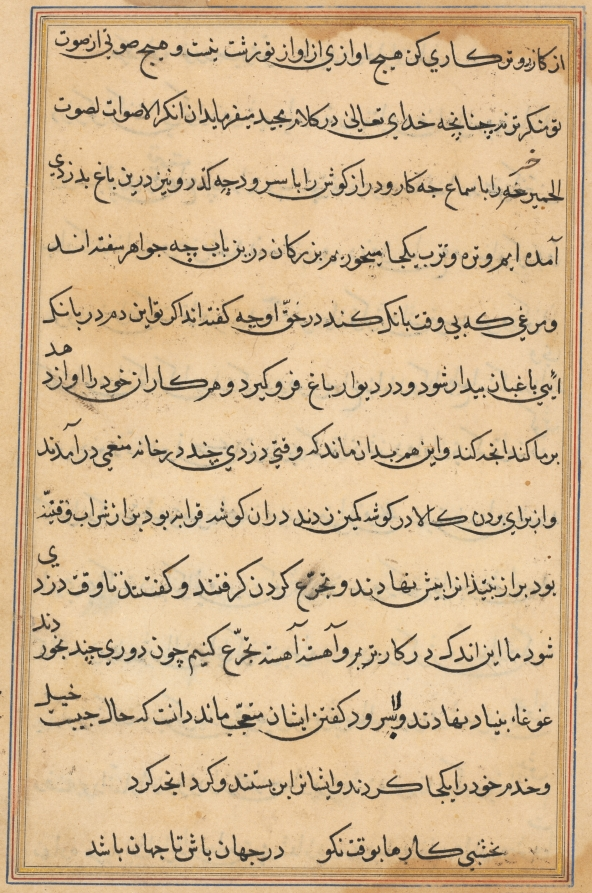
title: Page from Tales of a Parrot (Tuti-nama): text page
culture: Mughal India, court of Akbar (reigned 1556–1605)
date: c. 1560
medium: gum tempera, ink, and gold on paper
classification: Painting